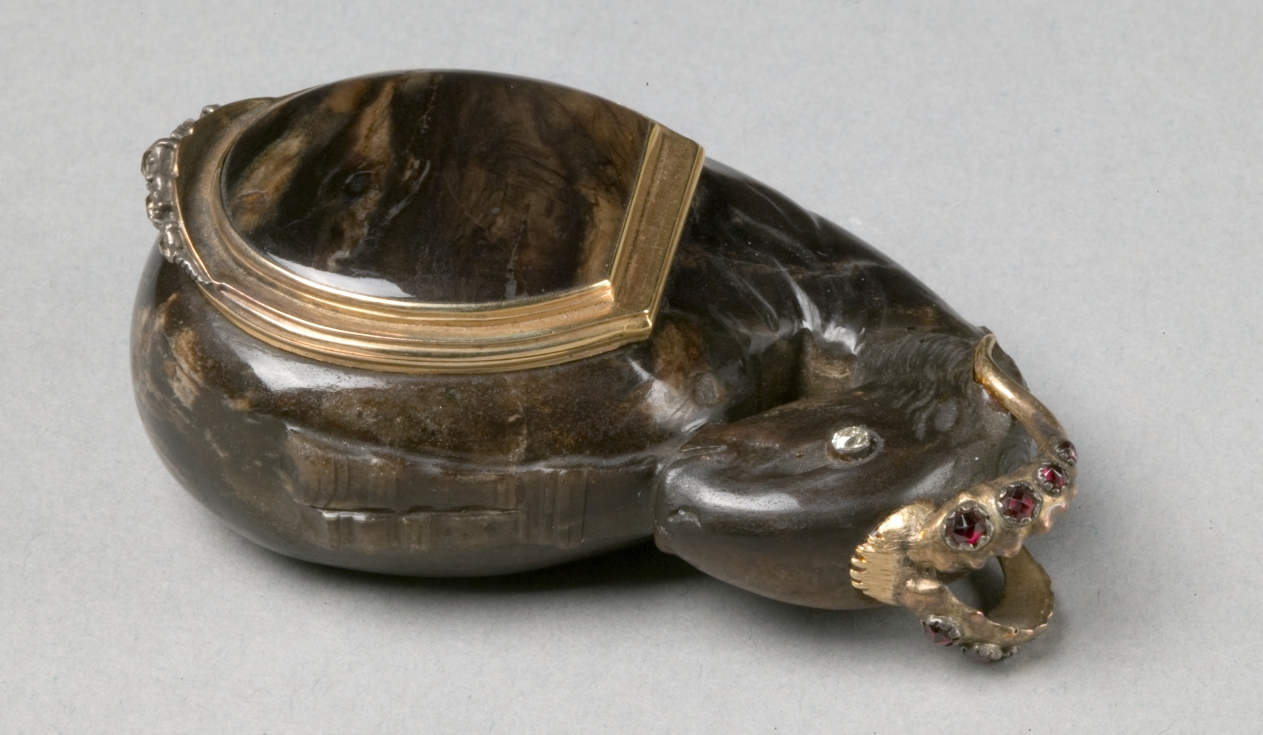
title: Snuff Box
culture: Germany, Berlin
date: c. 1730–60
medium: dark brown stone, gold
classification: Miscellaneous